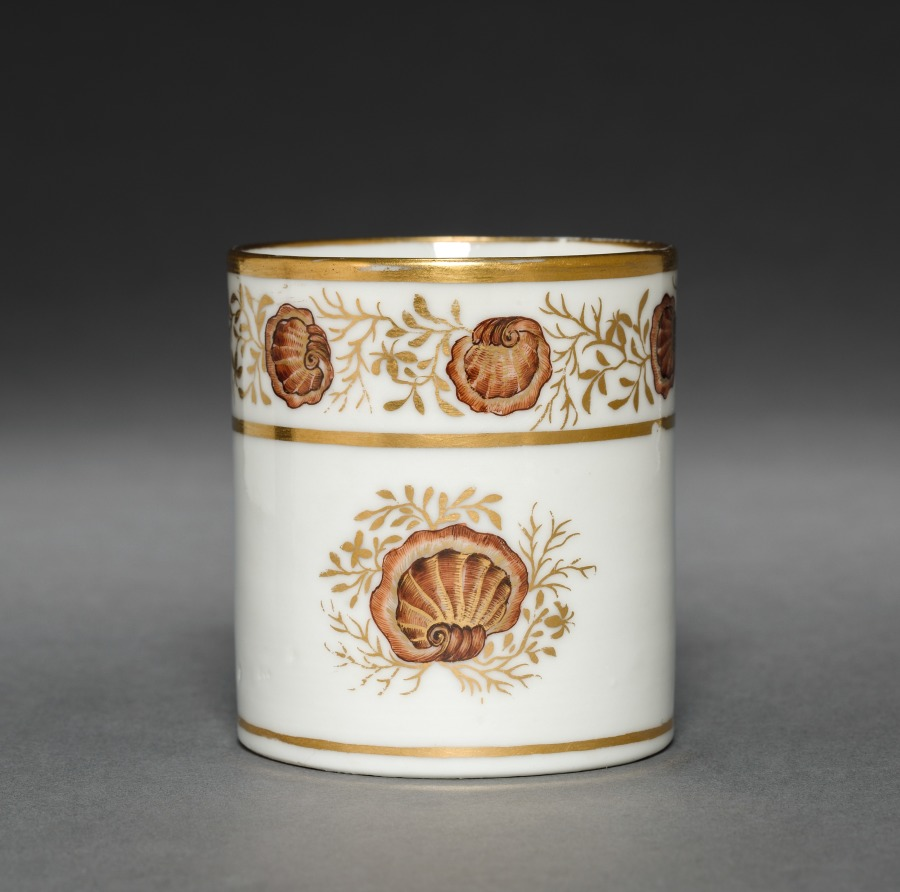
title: Cup from Oliver Wolcott, Jr. Tea Service (5 of 6)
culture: Chinese Export porcelain, late 18th-early 19th century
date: 1785–1805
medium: porcelain, sepia enamel, gold leaf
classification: Ceramic